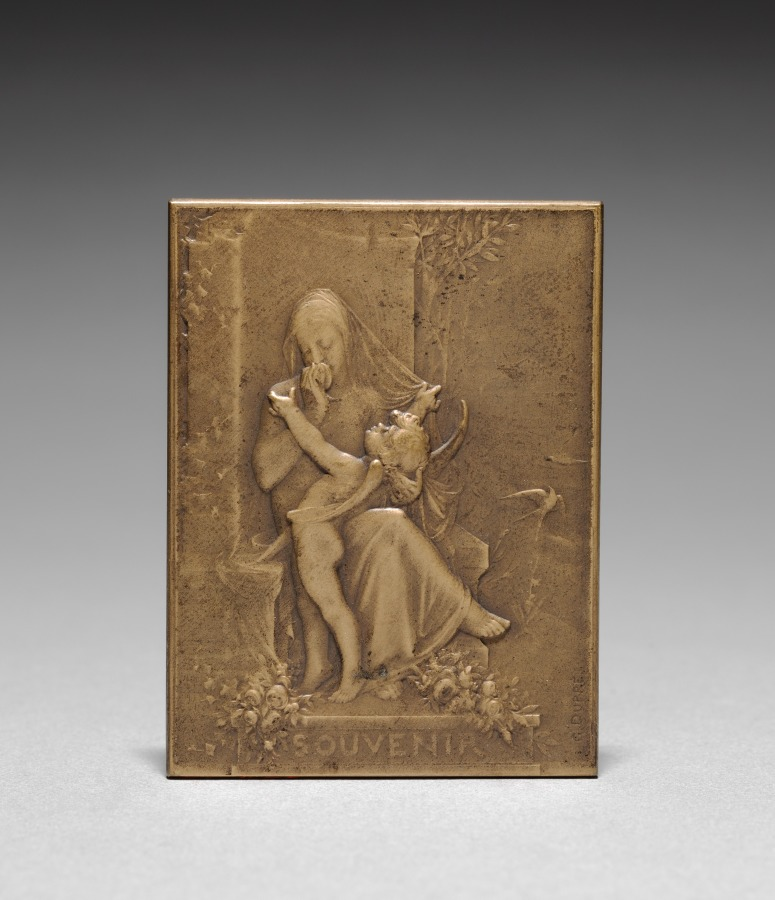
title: Medallion (obverse)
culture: France, 19th-20th century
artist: Jules Dupré (French, 1811–1889)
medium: bronze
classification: Metalwork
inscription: "Souvenir"; signed: "G. Dupré."